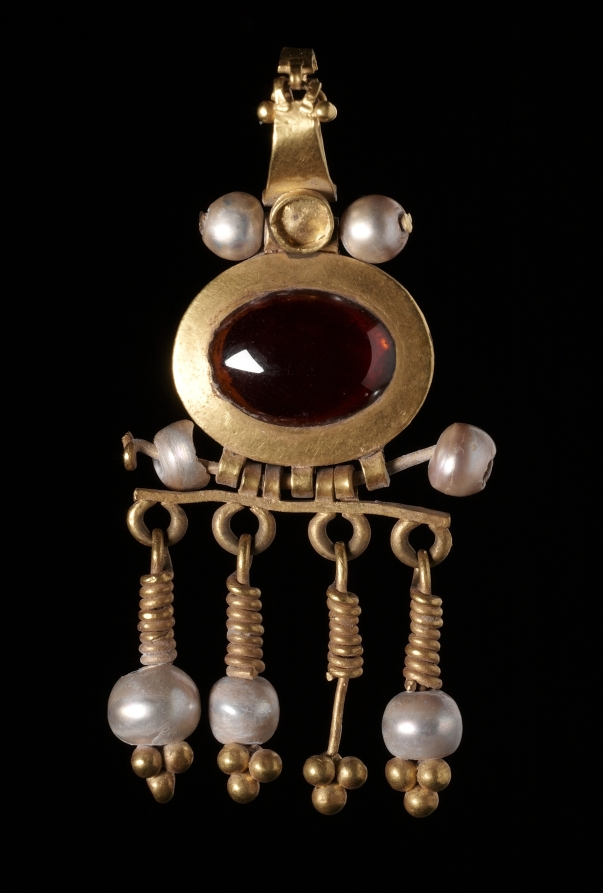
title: Pendant Earring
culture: Seleucia, Parthian Empire (247 BCE–224 CE)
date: 1–200 CE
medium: gold with garnet and pearls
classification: Jewelry